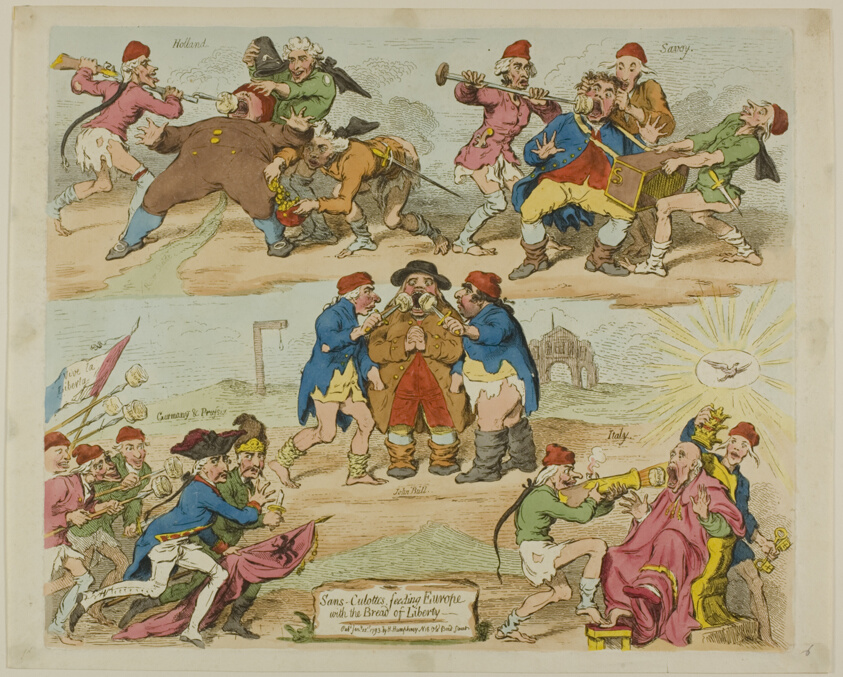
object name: Print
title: Sans-culottes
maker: James Gillray (English, 1757-1815); published by Hannah Humphrey (English, c. 1745-1818)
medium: Hand-colored etching on paper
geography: England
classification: etching; print; prints and drawing